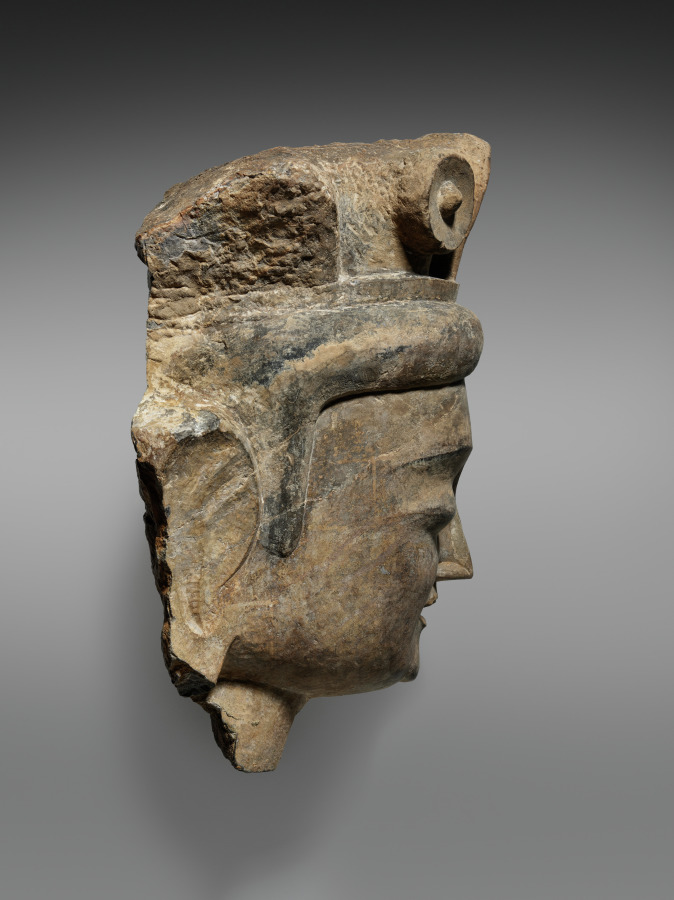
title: Head of Bodhisattva Guanyin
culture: China, Six Dynasties period (317-581), Northern Wei dynasty (386-534)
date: c. 510–520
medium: stone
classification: Sculpture